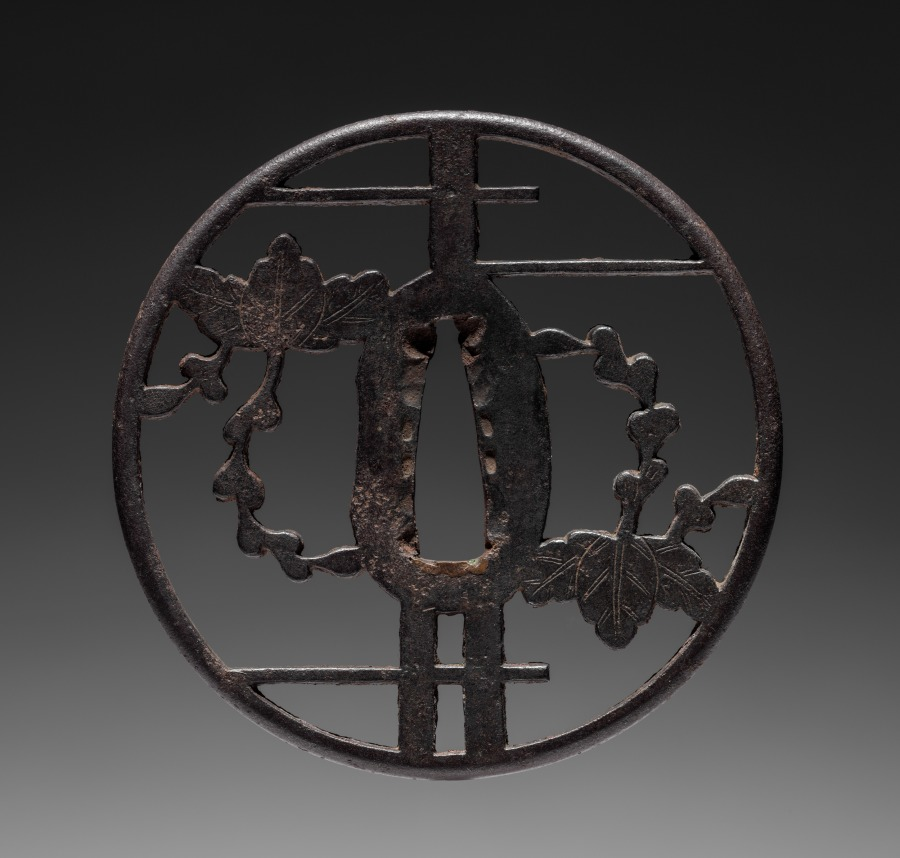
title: Sword Guard (Tsuba)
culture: Japan, possibly Edo period (1615-1868)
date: c. 1615–1868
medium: iron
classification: Arms and Armor